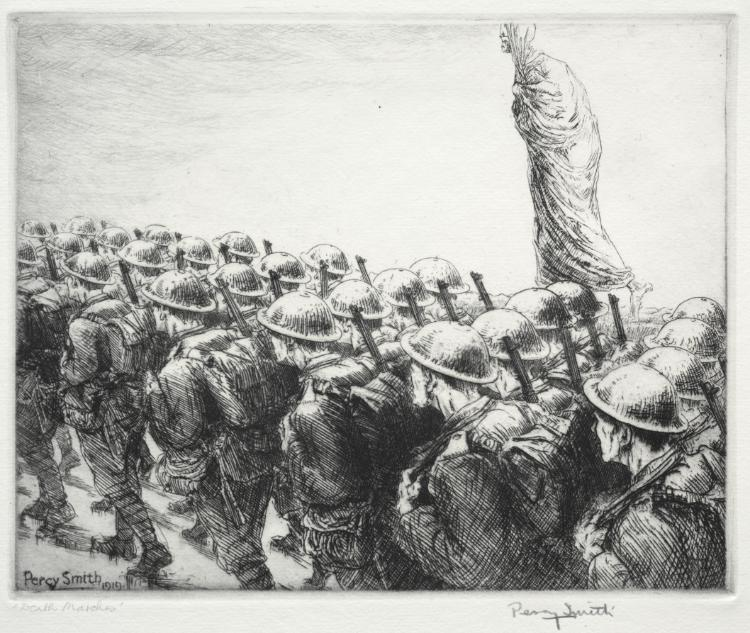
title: Dance of Death: Death Marches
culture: England, 20th century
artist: Percy John Delf Smith (British, 1882–1948)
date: 1919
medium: etching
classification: Print